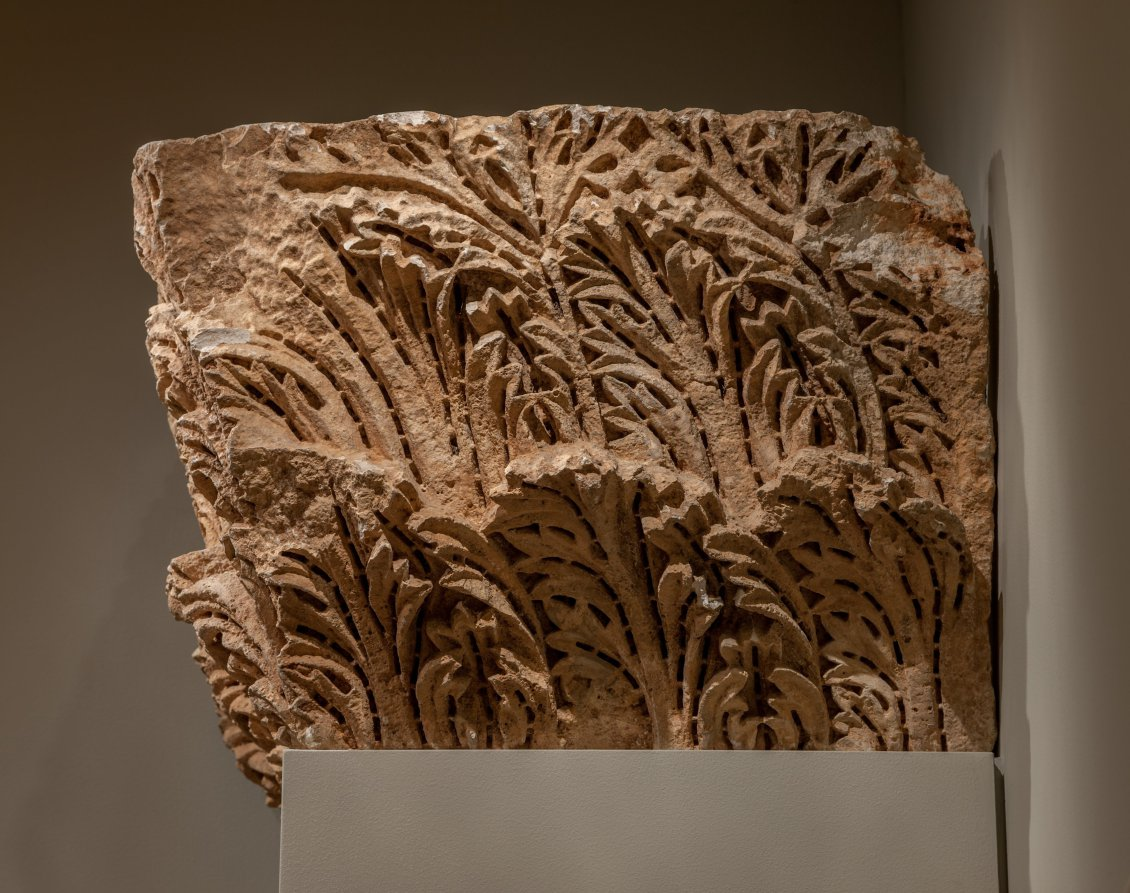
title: Engaged Capital with Windblown Acanthus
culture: Byzantium, Northern Syria, Byzantine period, 5th century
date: 400s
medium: limestone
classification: Sculpture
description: These capitals - the Capital with Acanthus and Crosses and the Engaged Capital with Windblown Acanthus - may have been found in Northern Syria and presumably come from a large and important church. Both capitals are decorated with leaves of acanthus, a fleshy plant with jagged leaves native to the Mediterranean area. One capital is symmetrical with crosses in its ornament, the other is asymmetrical and gives the impression of windblown leaves.